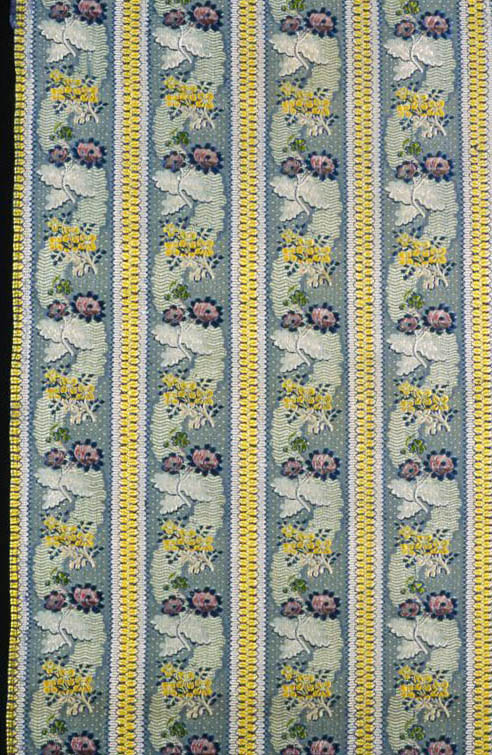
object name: Textile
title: Panel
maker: France, Lyon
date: 1760/80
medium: Silk, plain weave with supplementary patterning warps and self-patterned by complementary ground weft floats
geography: France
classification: textile; weaving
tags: flowers, foliage